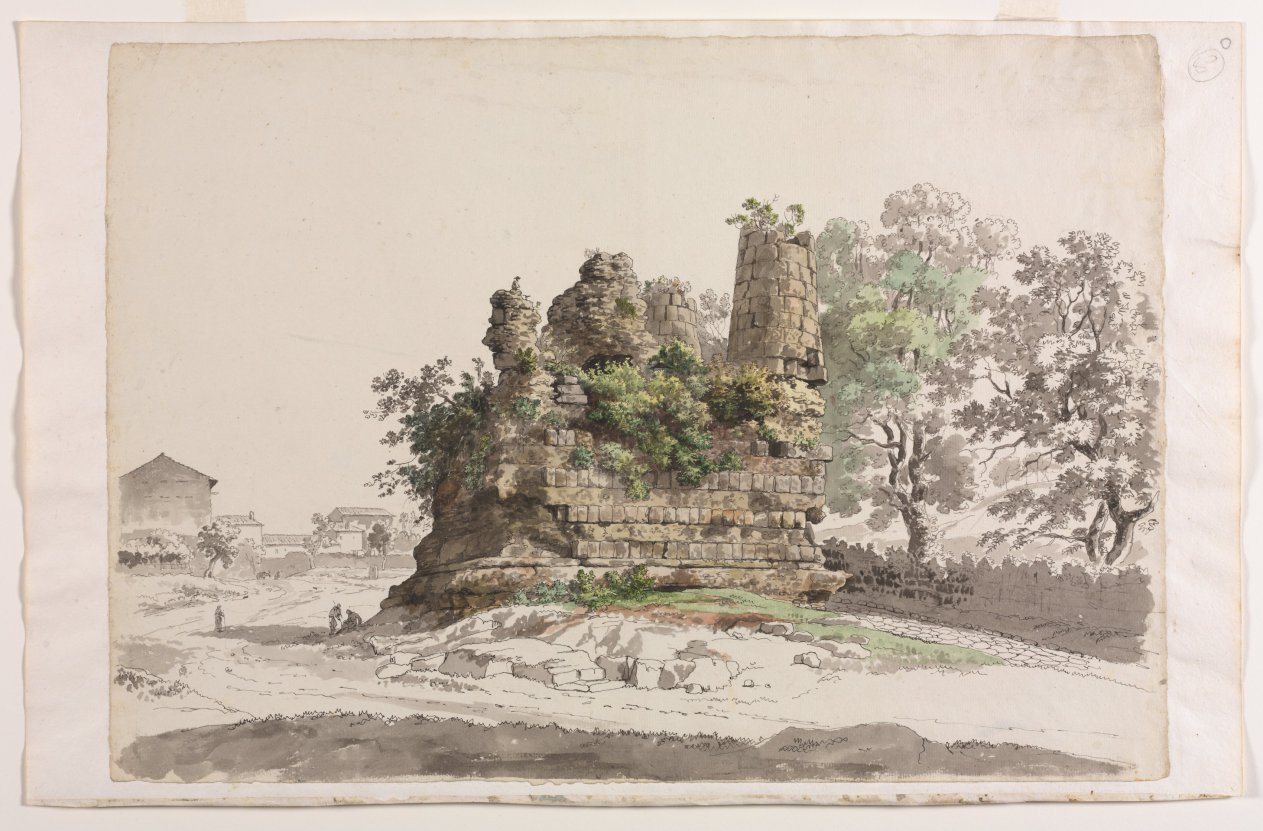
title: The So-Called Sepulcher of the Curiatii Brothers at Albano, with the Church of the Madonna della Stella in the distance at left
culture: Italy, 18th century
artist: Carlo Labruzzi (Italian, 1748–1817)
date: c 1770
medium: pen and black ink, grey wash and watercolor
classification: Drawing